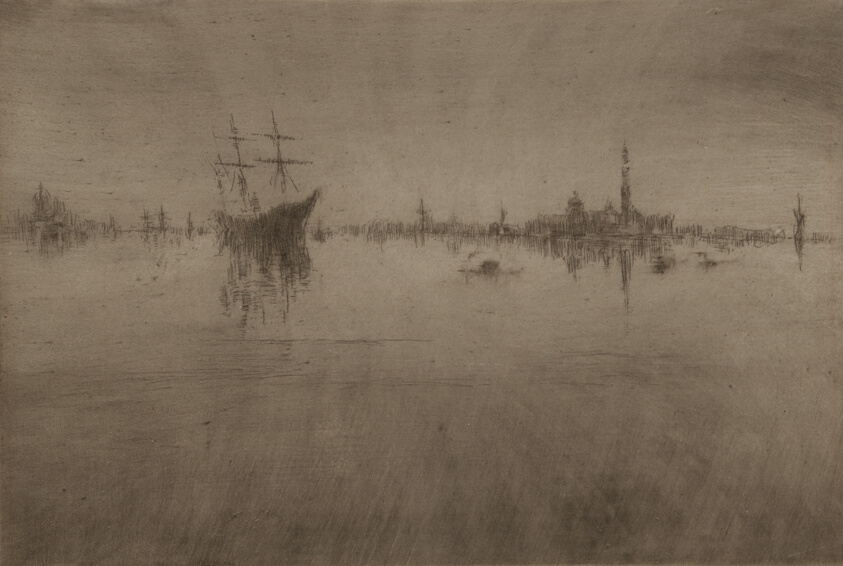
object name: Print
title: Nocturne, from Venice, a Series of Twelve Etchings (the "First Venice Set")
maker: James McNeill Whistler (American, 1834-1903)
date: 1879–80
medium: Etching and drypoint in brown on cream laid paper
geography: United States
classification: etching; print; prints and drawing; paper; drypoint